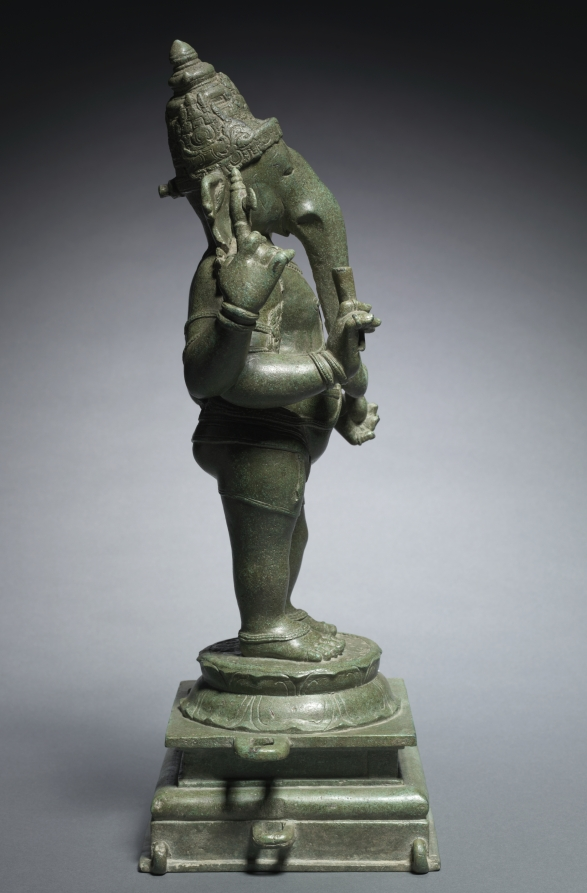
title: Ganesha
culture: South India, Medieval period, Chola dynasty(10th-13th century)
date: c. 1070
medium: bronze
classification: Sculpture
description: Ganesha, the god of wealth and abundance, is an auspicious and revered Hindu deity. He removes obstacles and protects his worshipers. Numerous myths explain how Ganesha became an elephant-man composite, but the most popular version relates the story of how he was decapitated by his enraged father, Shiva, and restored to life through the intervention of his mother, Parvati. Shiva agreed to revive him with the head of the first creature encountered: an elephant. Ganesha's strength—his profound spiritual wisdom—contrasts with his weakness for sweets, as indicated by his pudginess and the sweet modaka he carries. In Ganesha, opposing forces exist in perfect harmony.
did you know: Ganesha pulls his own broken tusk in one hand, which he used as a pen to write the epic Mahabharata.